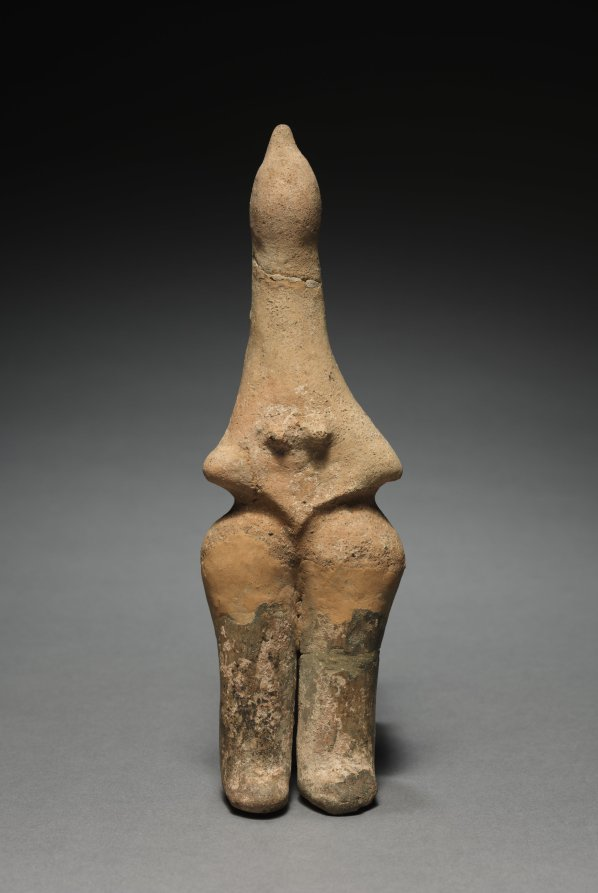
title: Figurine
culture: Iran, Amlash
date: 800s BCE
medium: terracotta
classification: Sculpture